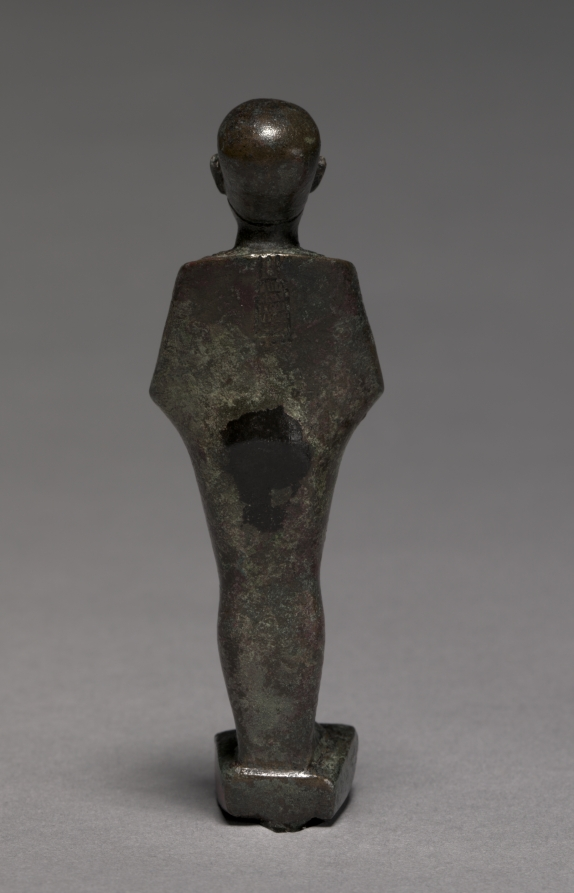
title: Statuette of Ptah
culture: Egypt, Late period (715–332 BCE), Dynasty 26 or later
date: 664–525 BCE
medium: bronze, solid cast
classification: Sculpture